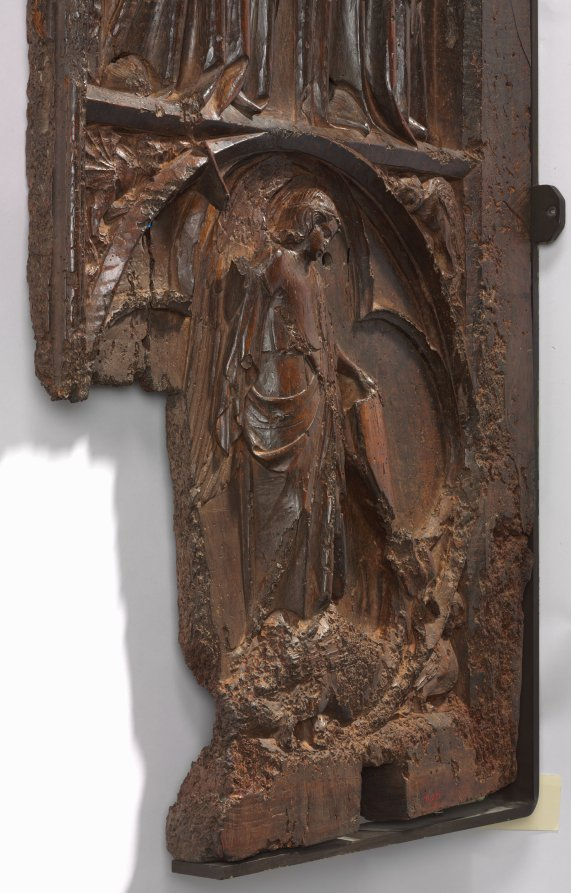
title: Panel from a Choir Stall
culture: Spain, Catalonia, Monastery of Pedralbes, 14th century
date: c. 1330–1340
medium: walnut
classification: Furniture and woodwork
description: The large panel shown here was probably the end panel of a stall that faced another across the choir of a Gothic church. The panel is carved with the figure of St. Francis of Assisi kneeling in prayer and receiving the stigmata. Two standing figures also appear on this panel: a nun at the left (perhaps St. Claire) and a female martyr at the right. Below is St. Michael and the dragon.